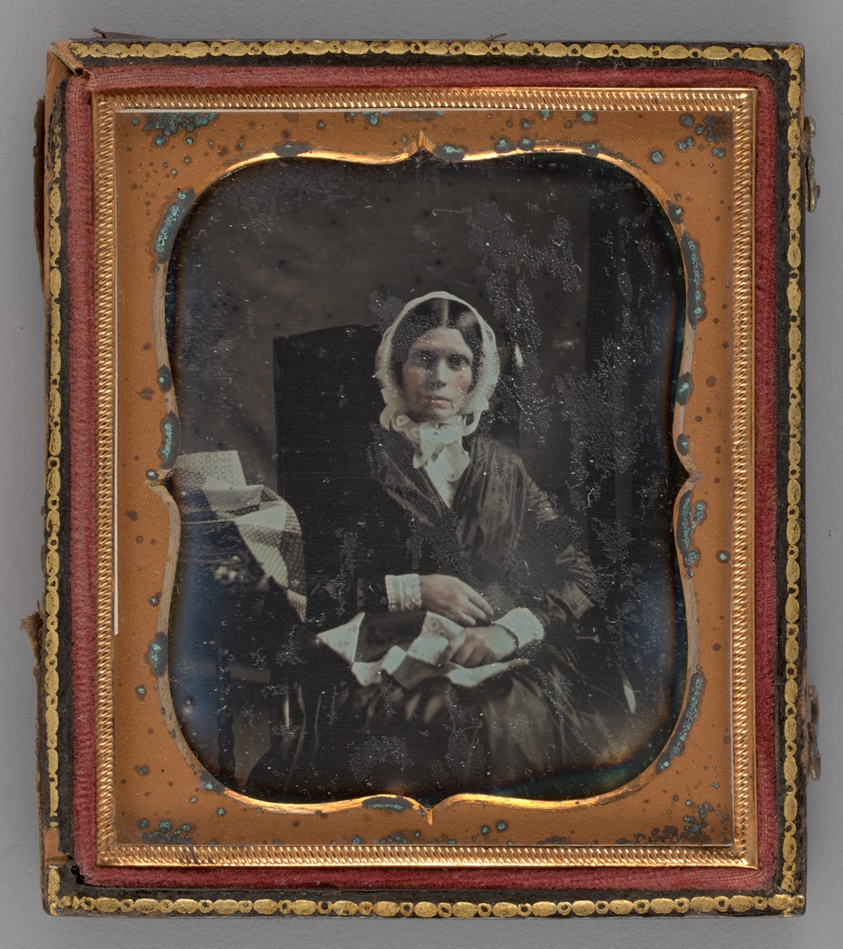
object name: Photograph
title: Untitled (Portrait of a Seated Woman)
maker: Unknown maker; American, 19th century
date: 1854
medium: Daguerreotype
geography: United States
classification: portrait; daguerreotype; portrait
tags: lundberg collection, portraits: female subject, female, portraits, portrait, photography